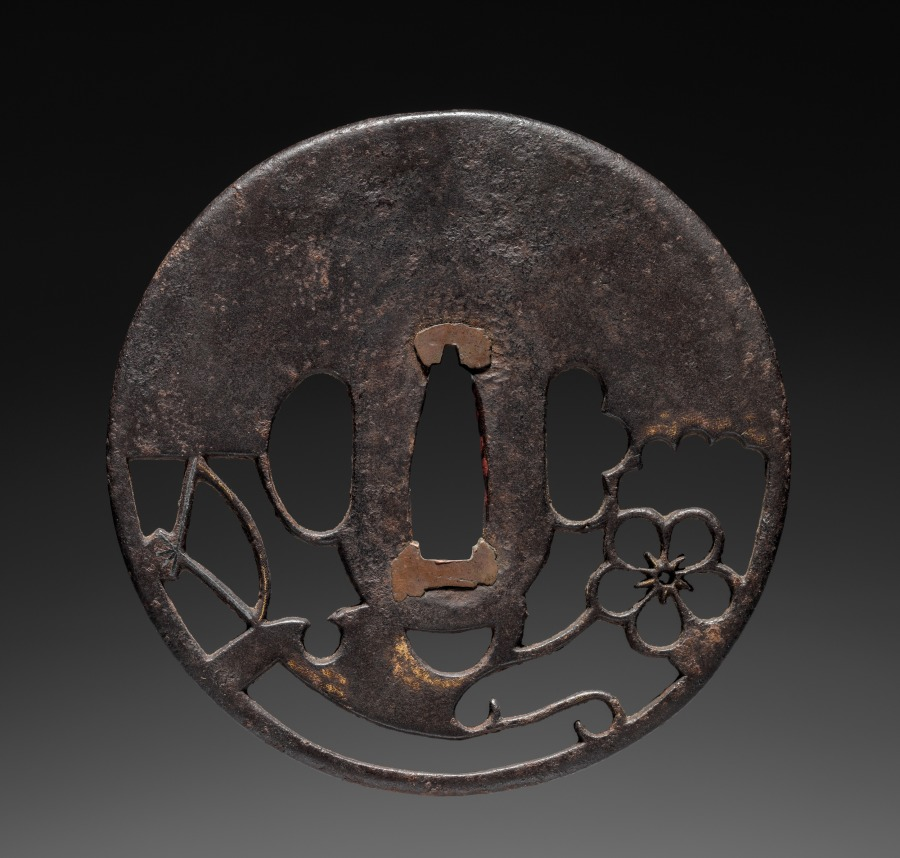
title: Sword Guard (Tsuba) with Plum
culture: Japan, possibly Edo period (1615-1868)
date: c. 1615–1868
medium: iron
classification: Arms and Armor